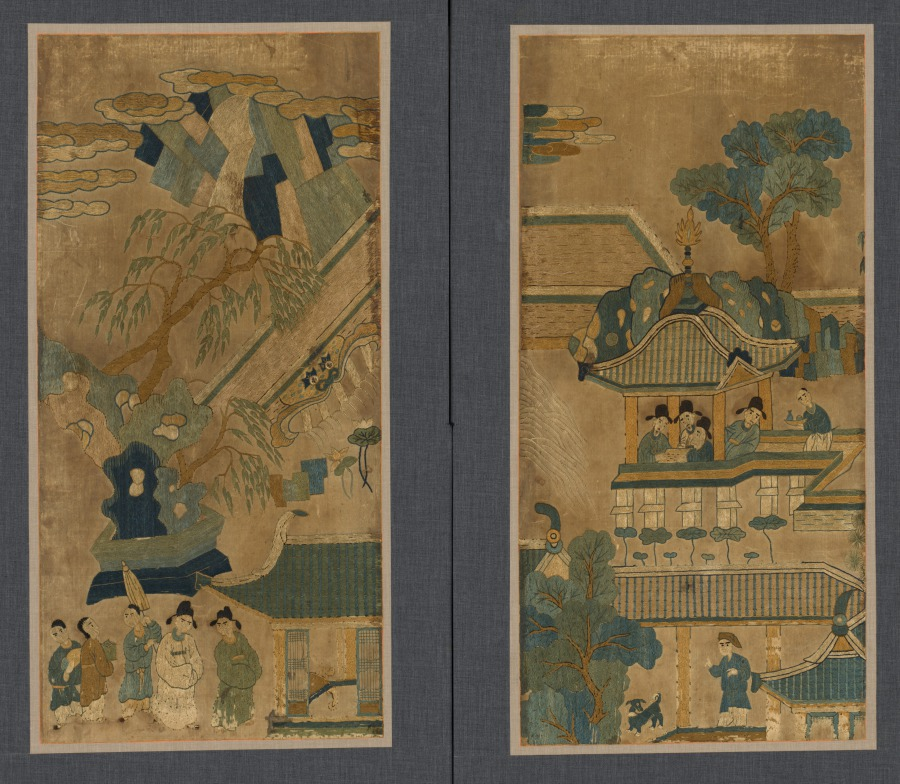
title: General Guo Ziyi’s Birthday Banquet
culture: Korea, Joseon dynasty (1392–1910)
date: early or mid-1800s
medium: Eight-panel folding screen, embroidery on silk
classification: Textile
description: The subject of this folding screen is a banquet in honor of Guo Ziyi (697–781), who is considered one of the greatest generals in Chinese history. He had a long and successful military career as well as a blissful family life. Thus, his image surrounded by his numerous family members symbolize the paragon of success and happiness. Using a wide spectrum of colorful silk threads, the artist colorfully depicts Guo enjoying his full-fledged retirement life.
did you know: This folding screen is highly likely to have been created by an amateur woman embroiderer.